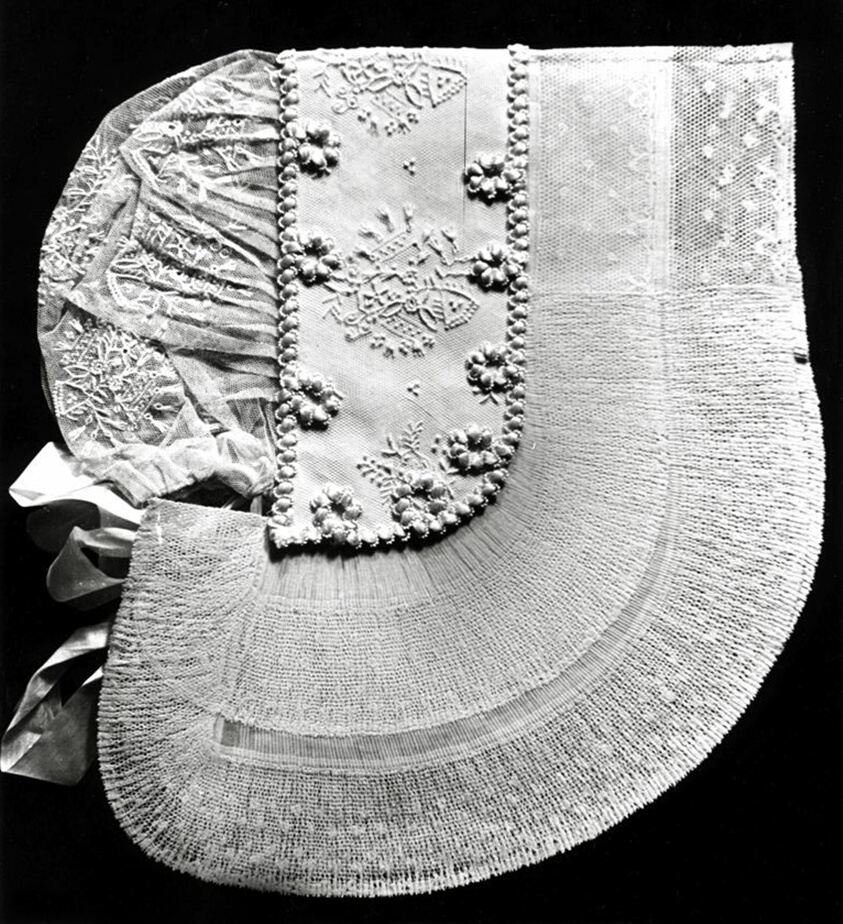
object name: Textile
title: Cap (Peasant Work)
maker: Possibly France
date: 1875/1900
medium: Cotton, machine-made twist net; embroidered with cotton in back, eyelet, overcast, padded satin and twined double running stitches; trimmed with silk-wrapped-cotton cord; edged with cotton, plain weave and linen, bobbin straight lace; pleated; starched; ribbons of silk, warp-float faced 4:1 satin weave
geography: France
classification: textile; needlework (visual works)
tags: fashion